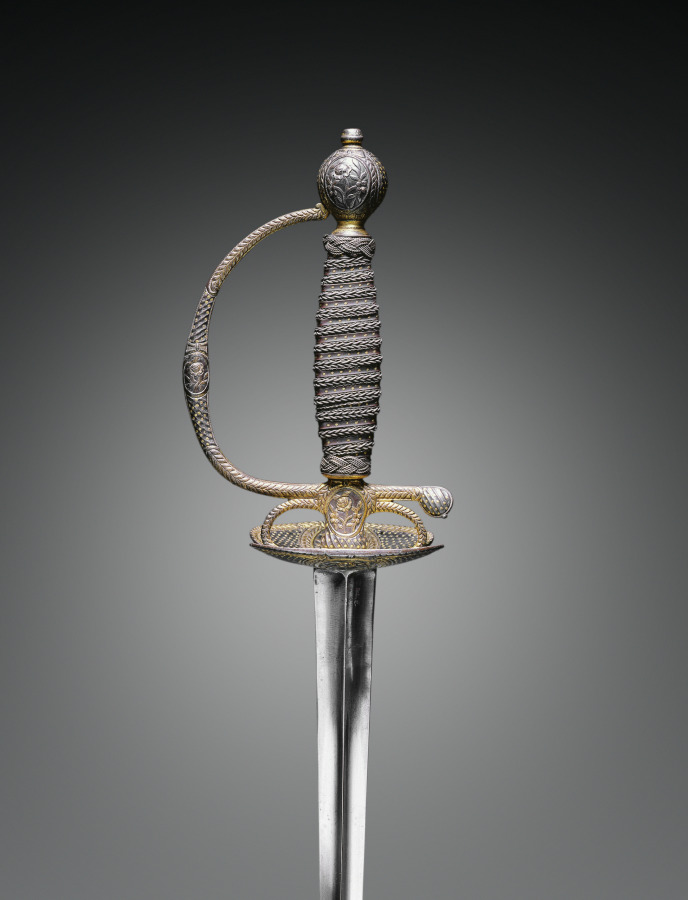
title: Small Sword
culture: France, Paris (?), 18th century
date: c. 1780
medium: forged steel blade; partially gilt and russet steel hilt; steel wire, leather bands, wood core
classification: Arms and Armor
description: During the 1700s, the small-sword emerged as a light, quick weapon. Like the rapier it was carried by unarmored civilians, the noblemen of the upper classes. Over time this delicate sword became more an accessory of male attire than a weapon essential to life and death. The sword hilt, which shows even when the blade is sheathed, became the ground for elaborate decoration. These small-swords thus represent the final stage in the evolution of the sword, from the edged weapons of antiquity to the elegantly refined blades of the 1700s and 1800s.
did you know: The fashion among gentleman for wearing small-swords with everyday attire began to wane by the end of the 1700s with the exception of the military dress sword.